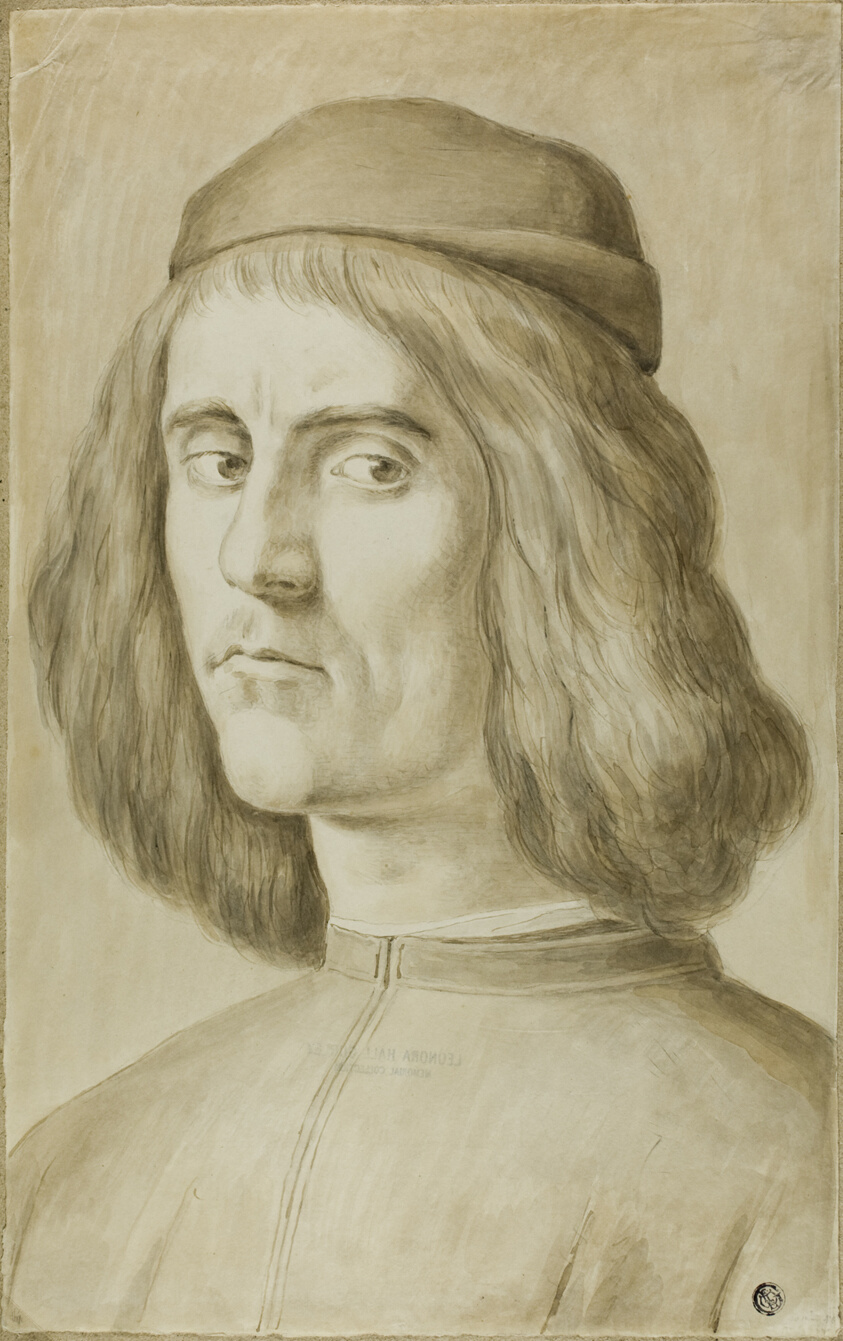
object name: Drawing and Watercolor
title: Portrait Bust of a Young Man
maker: After Alessandro Filipepi, called Sandro Botticelli; Italian, 1444/45-1510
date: after 1829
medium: Brush and brown ink and brown and gray wash, over traces of graphite, on ivory wove paper, tipped on to tan laid paper with gray fibers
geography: Italy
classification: ink and wash; drawings (visual works); prints and drawing